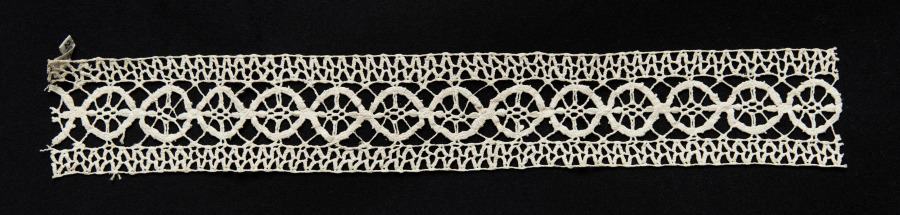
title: Lace Insertion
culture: Italy, Genoa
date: 1580–99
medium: Bobbin lace (needle lace, reticella design)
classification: Lace